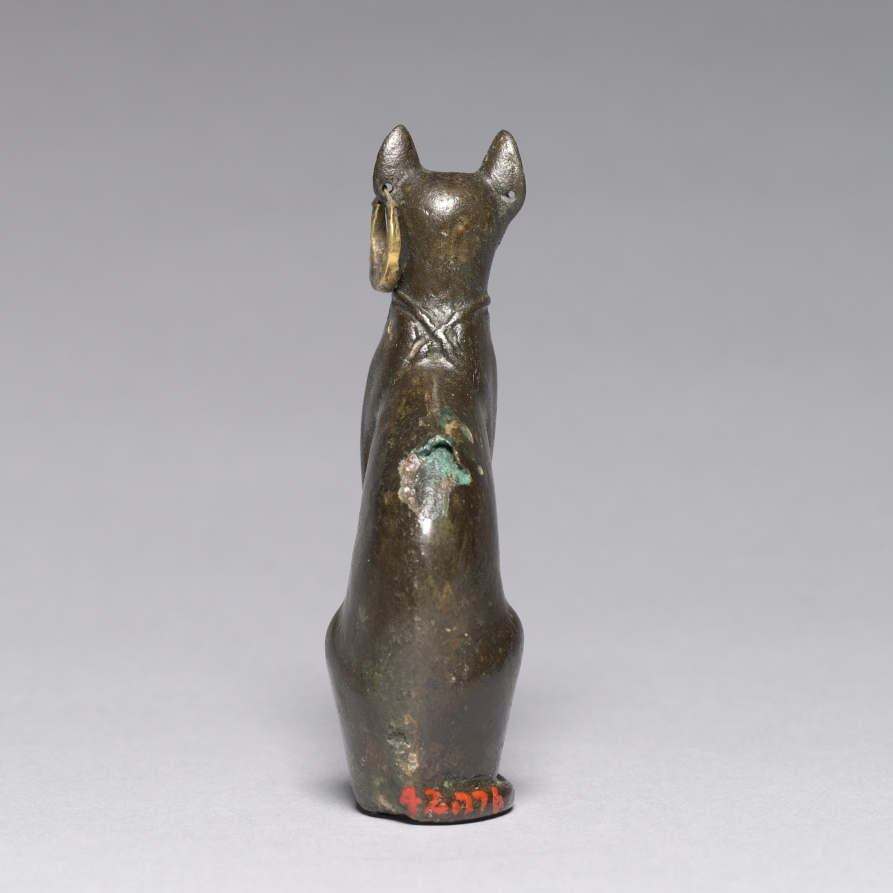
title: Cat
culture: Egypt, Late period (715–332 BCE), Dynasty 26 or later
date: 664–30 BCE OR 664–330 BCE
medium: bronze and gold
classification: Sculpture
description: Cats were the sacred animal of Bastet, Egyptian goddess of fire, cats, and protector of the home. Sitting upright in a pose characteristic of these feline figurines, this bronze cat adorned with an embossed pendant and gold earring was made as a votive offering to be deposited with the deceased.